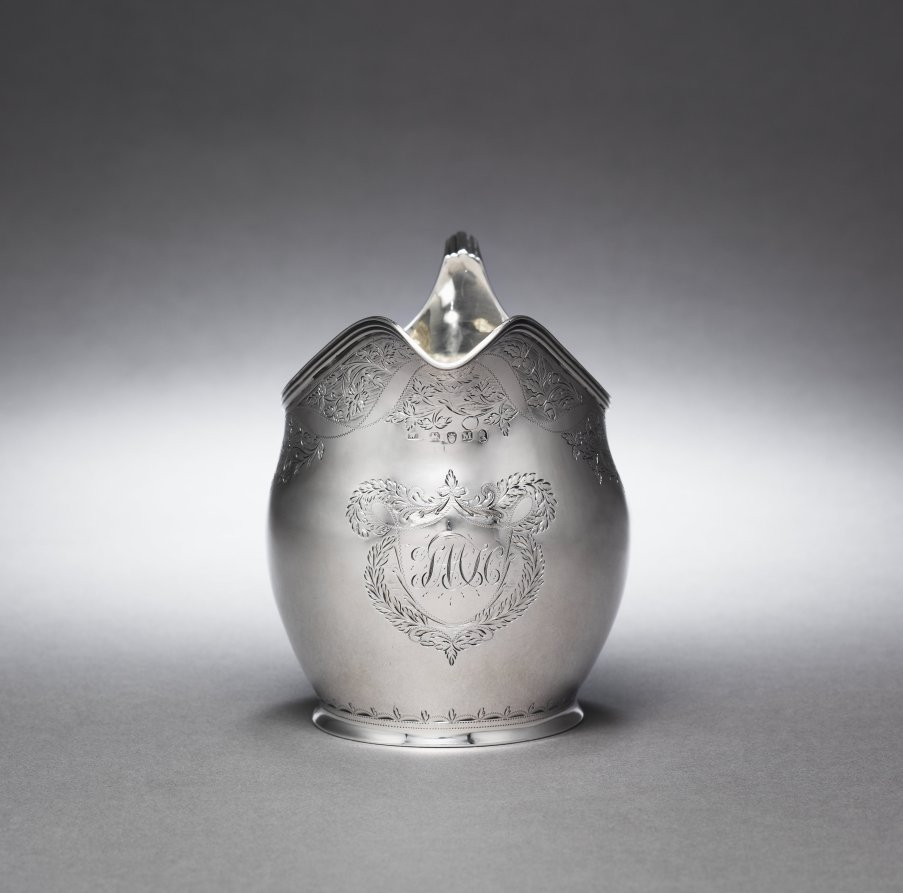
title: Tea Service (Creamer)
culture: London, England, 19th century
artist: Anne Bateman (British, 1748–1813)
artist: Peter Bateman (British, 1740–1825)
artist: William (I) Bateman (British, 1774–1850)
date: 1807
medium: silver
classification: Silver